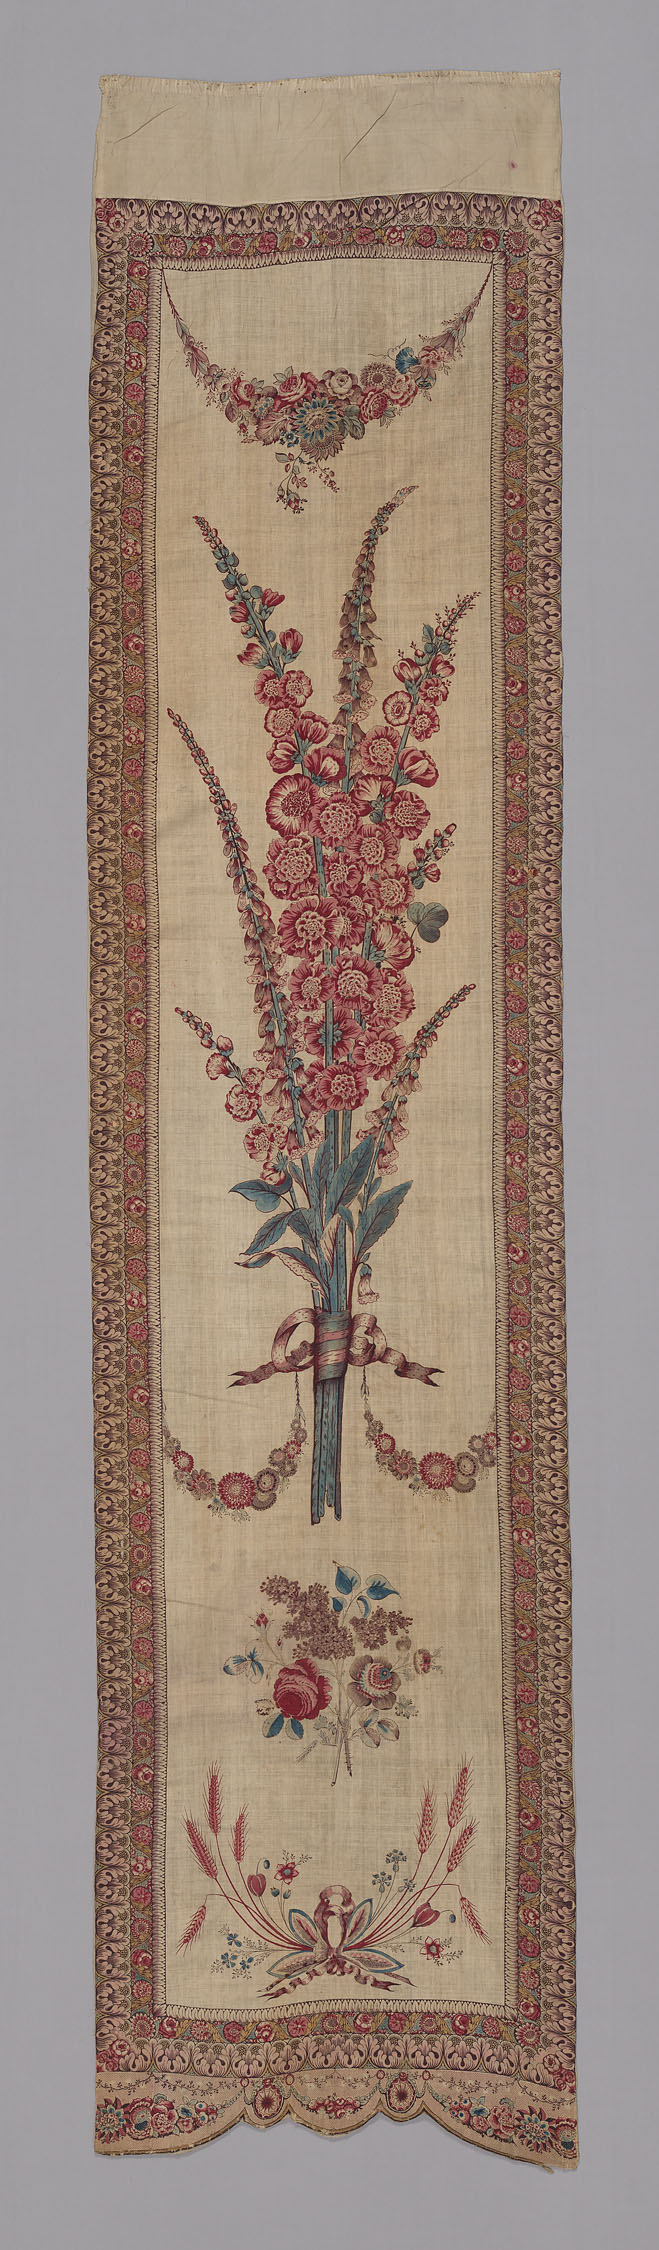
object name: Textile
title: Part of a Bed Set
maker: France, Nantes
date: 18th century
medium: Cotton, plain weave; block printed and painted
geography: France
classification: textile; weaving - printed